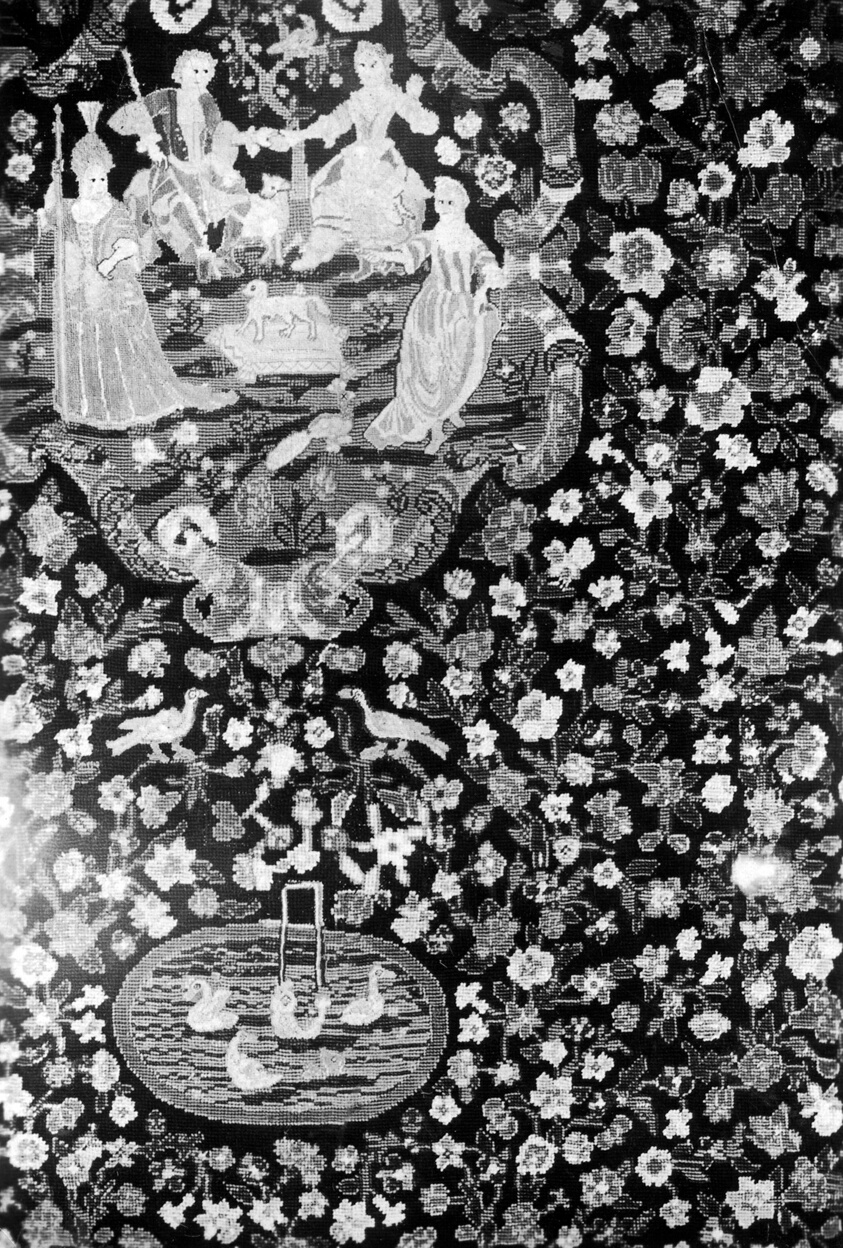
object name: Textile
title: Carpet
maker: England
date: 18th century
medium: Silk and wool, plain weave; embroidered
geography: England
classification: weaving - carpet; needlework - carpet; textile